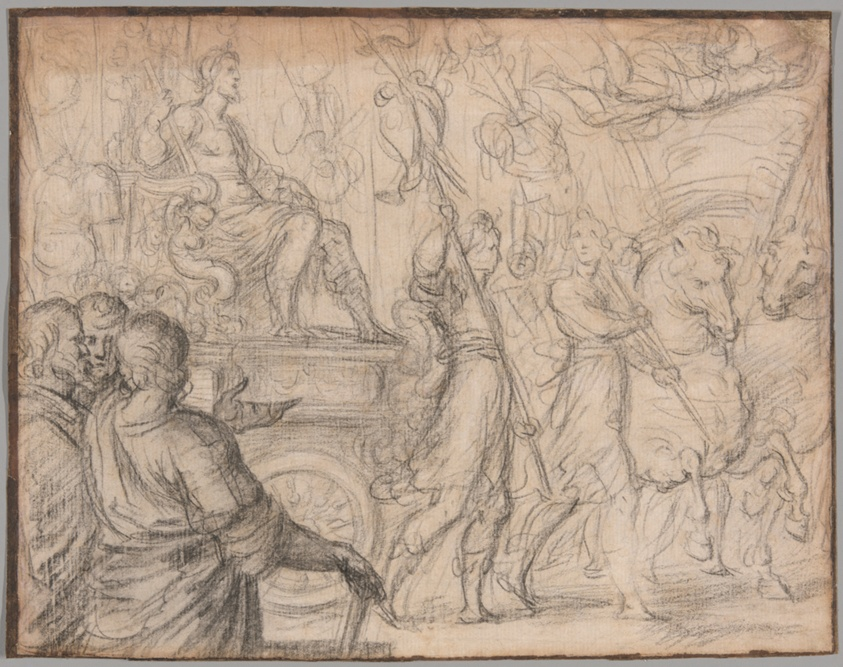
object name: Drawing and Watercolor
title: A Procession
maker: Ambroise Dubois (French, 1543–1615)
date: c. 1610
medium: Black chalk, with touches of white chalk, on cream laid paper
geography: France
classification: drawings (visual works); paper; chalk; prints and drawing